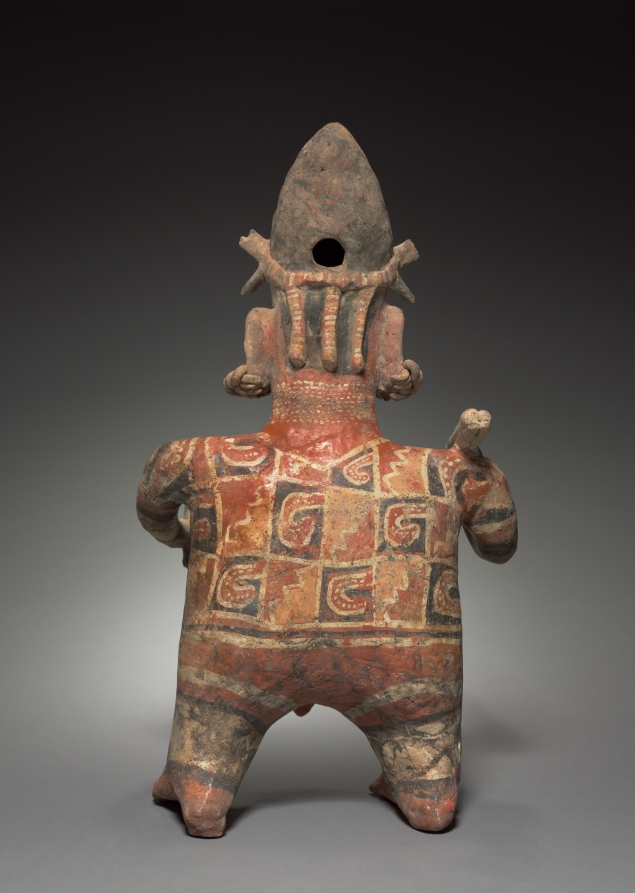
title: Standing Male Figure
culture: Mexico, Nayarit, Ixtlan del Rio Style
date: c. 100 BCE–300 CE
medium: earthenware with colored slips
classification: Sculpture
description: Like his female companion, this male figure is portrayed in all his finery. He carries spears, indicating that he is a hunter or warrior, and his confident grin conveys aggression and vitality.